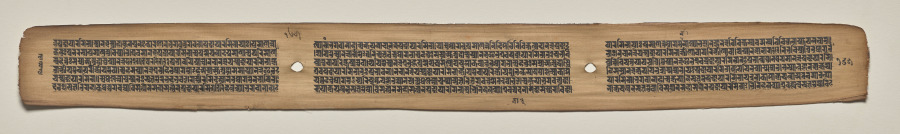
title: Text, folio 165 (verso), from a Manuscript of the Perfection of Wisdom in Eight Thousand Lines (Ashtasahasrika Prajnaparamita-sutra)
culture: Eastern India, Bihar, Vikramashila Monastery. Painting: Nepal, Kathmandu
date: Sunday, September 14, 1119 (year 239 of the Newar Samvat in the month of Ashvina)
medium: gum tempera and ink on palm leaves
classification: Painting